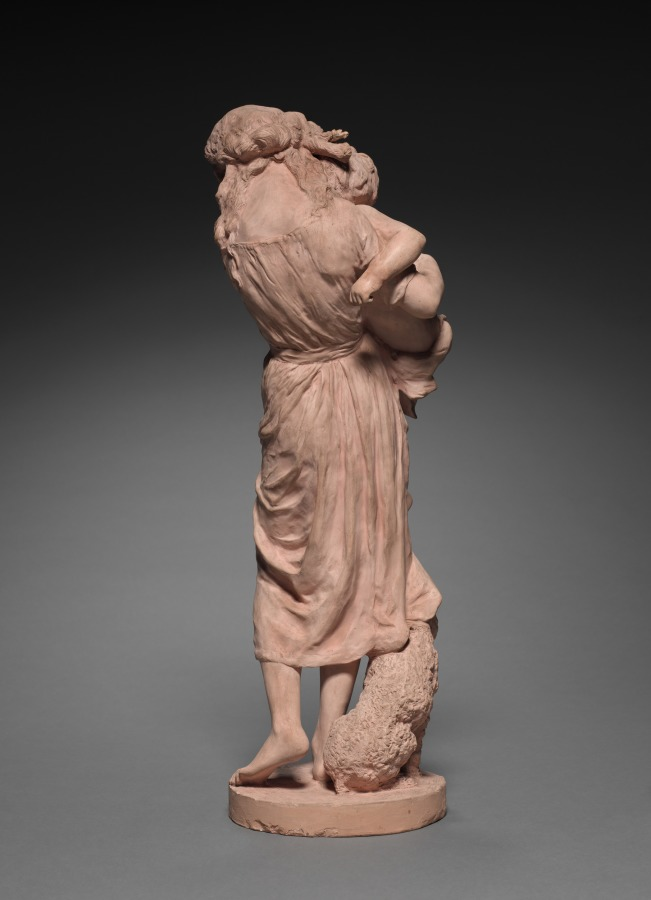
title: Brother and Sister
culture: France, 19th century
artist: Jean-Baptiste Carpeaux (French, 1827–1875)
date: 1875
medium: terracotta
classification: Sculpture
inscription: Signed "JBT" Carpeaux/1875" upper surface of base.